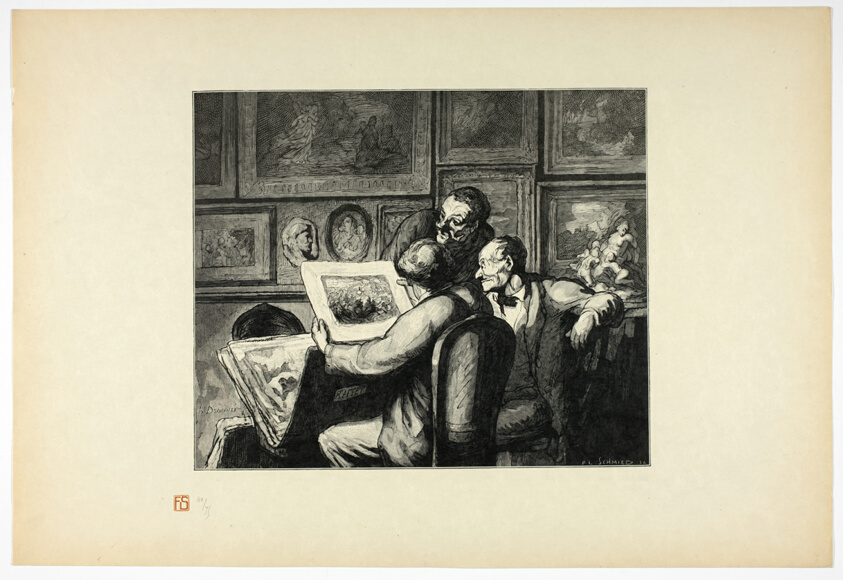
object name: Print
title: Les amateurs d'estampes, from Tirage Unique de Trente-Six Bois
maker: François Louis Schmied (Swiss, 1873-1941); after Honoré Victorin Daumier (French, 1808-1879); printed by François Louis Schmied (Swiss, 1873-1941); published by Jules Meynial (French, 20th century)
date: 1868, printed 1920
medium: Wood engraving on cream Japanese paper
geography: Switzerland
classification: wood engraving; print; prints and drawing